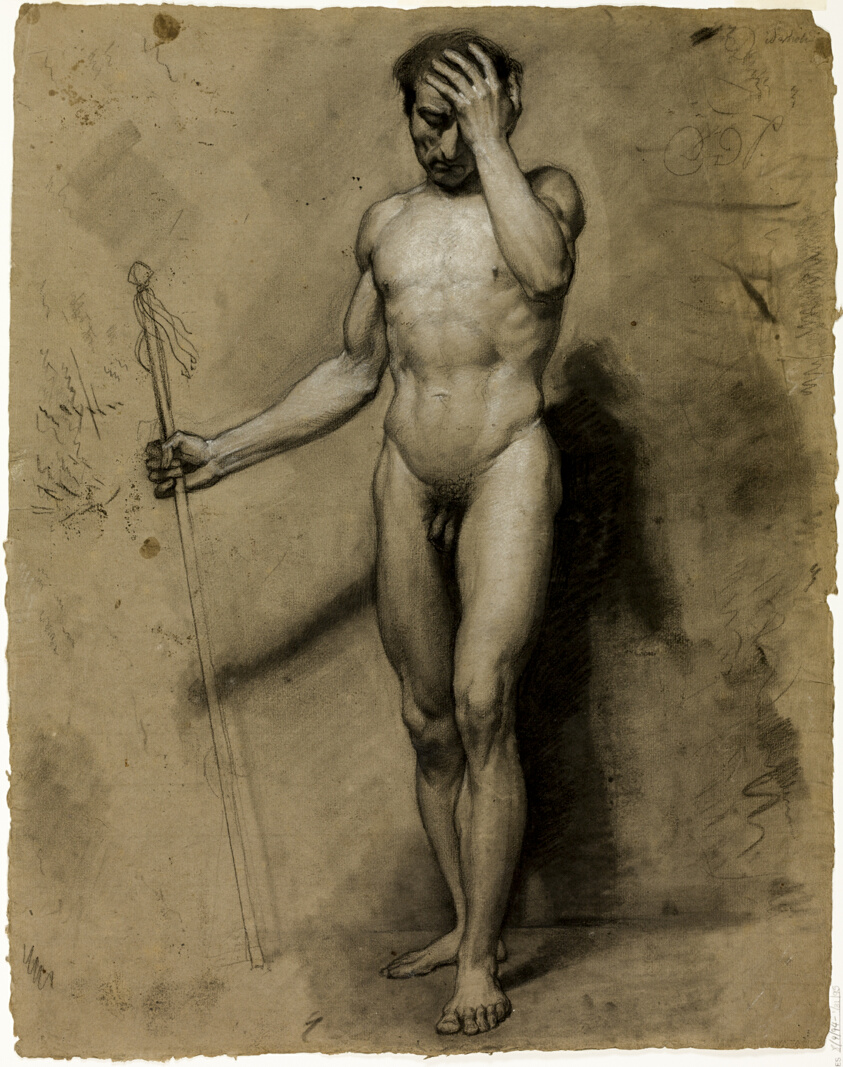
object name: Drawing and Watercolor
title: Standing Male Nude (recto); Classical Head (verso)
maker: Paul Émile Detouche (French, 1794-1874)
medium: Black chalk, with stumping and white heightening (recto), charcoal with white heightening (verso), on buff laid paper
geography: France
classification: charcoal; drawings (visual works); prints and drawing